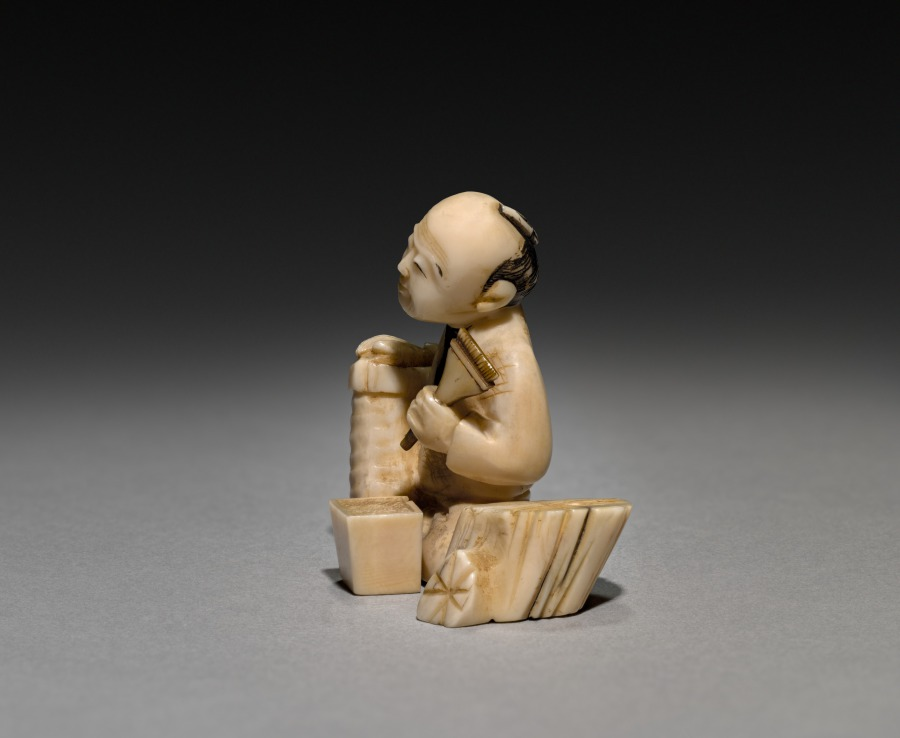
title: Man with Brush and Lantern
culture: Japan, Meiji period (1868–1912)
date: early 1900s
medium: ivory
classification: Ivory